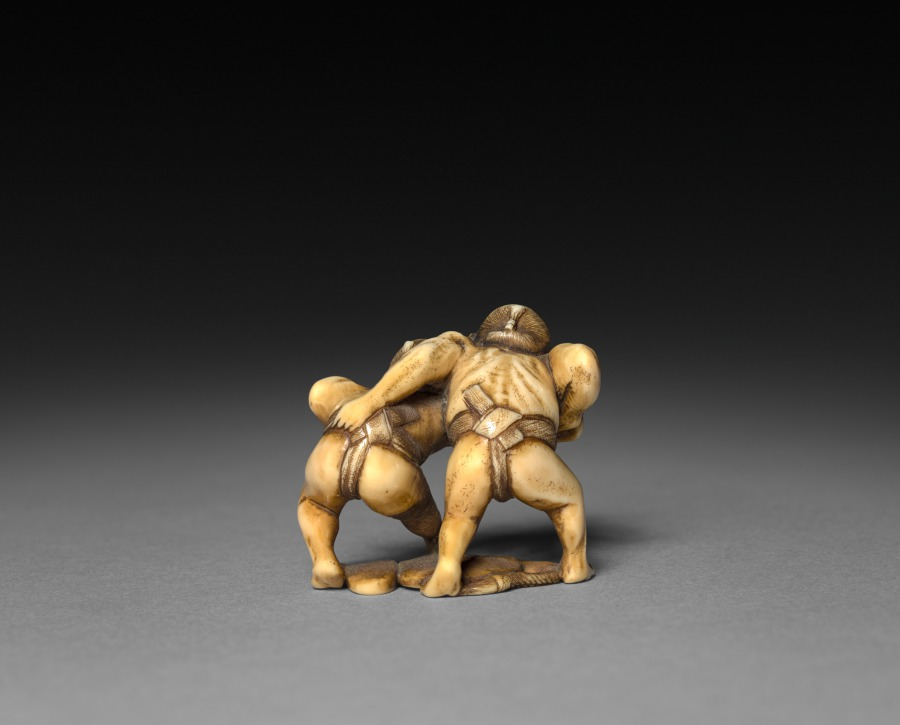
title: Two Wrestlers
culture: Japan, Edo period (1615–1868)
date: early to mid-1800s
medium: ivory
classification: Netsuke